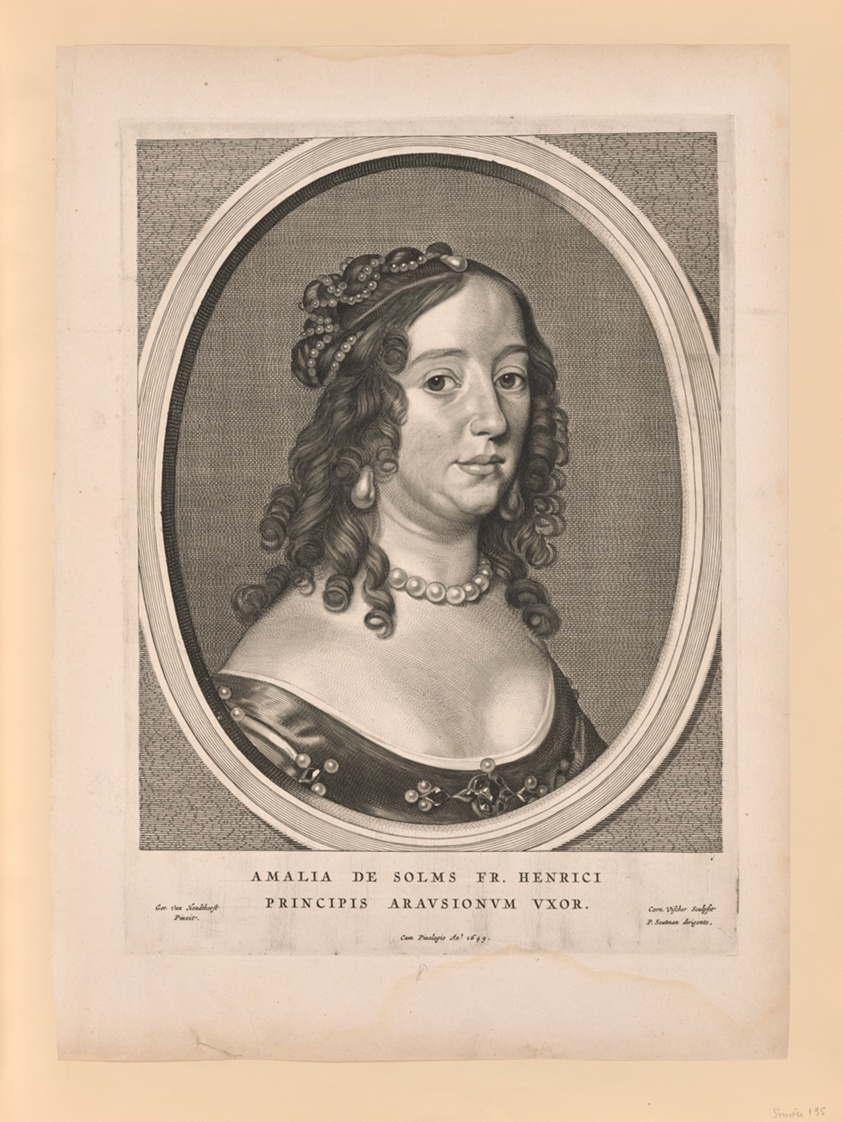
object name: Print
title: Amalia van Solms, wife of Frederick Henry, from Nine Portraits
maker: Cornelis Visscher (Dutch, c. 1629-1658); after Gerrit van Honthorst (Dutch, 1592-1656)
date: 1649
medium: Engraving on paper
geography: Netherlands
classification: engraving; paper; print; prints and drawing